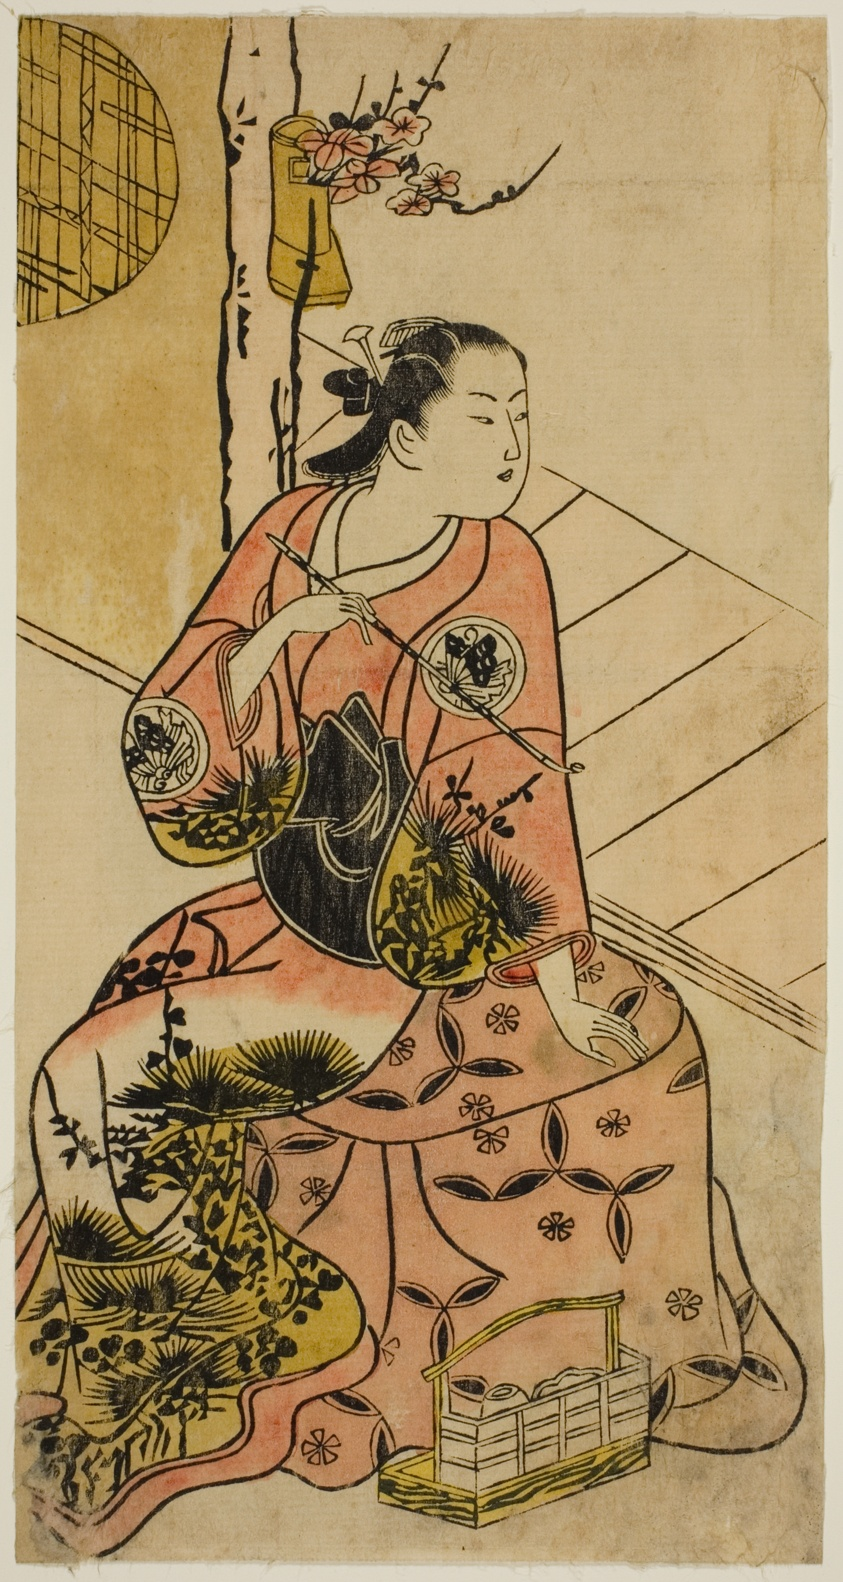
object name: Print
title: The Actor Sanjo Kantaro holding a pipe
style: Japanese (culture or style)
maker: Artist Unknown; Japanese, early 18th century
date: c. 1720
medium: Hand-colored woodblock print; hosoban, urushi-e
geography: Japan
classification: woodblock print; print; asian art